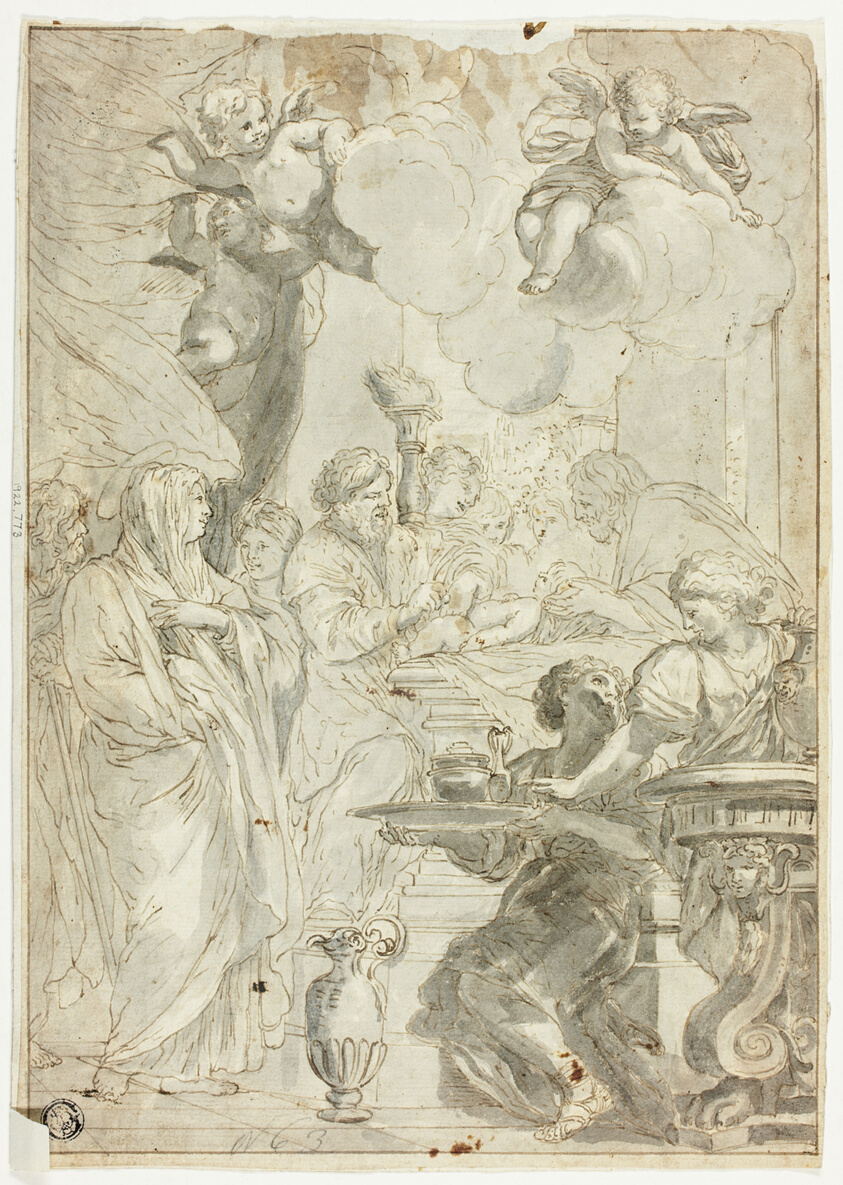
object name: Drawing and Watercolor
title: Circumcision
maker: probably after Ciro Ferri (Italian, 1634-1689); possibly after Pietro da Cortona (Italian, 1596-1669)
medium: Pen and brown ink, with brush and gray wash, over traces of graphite, on ivory laid paper, laid down on ivory laid paper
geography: Italy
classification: drawings (visual works); prints and drawing